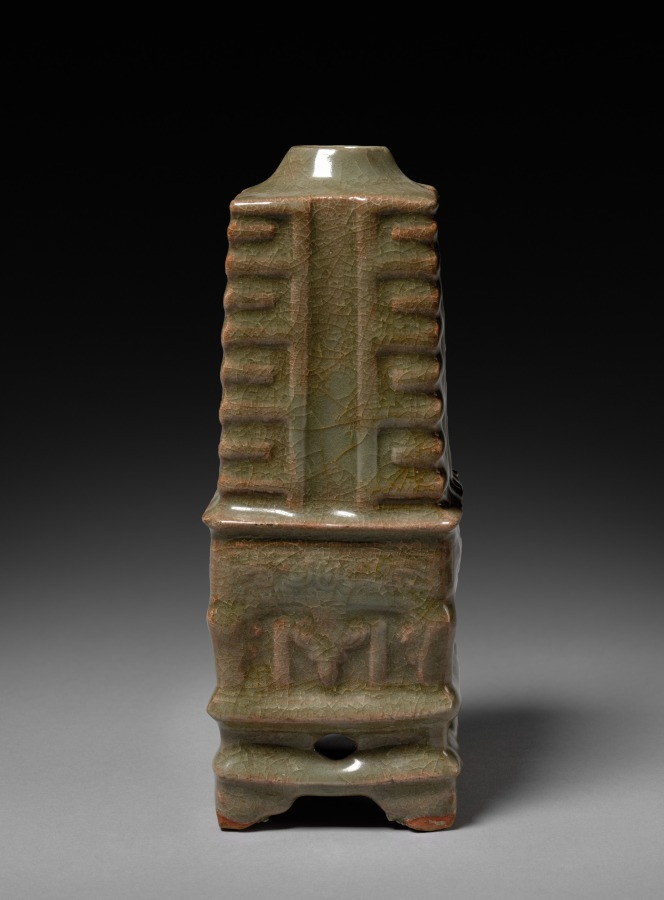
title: Vase in Shape of Cong: Southern Celadon Ware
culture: China, Zhejiang province, Yuan dynasty (1271-1368)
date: 1271–1368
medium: glazed buff stoneware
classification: Ceramic